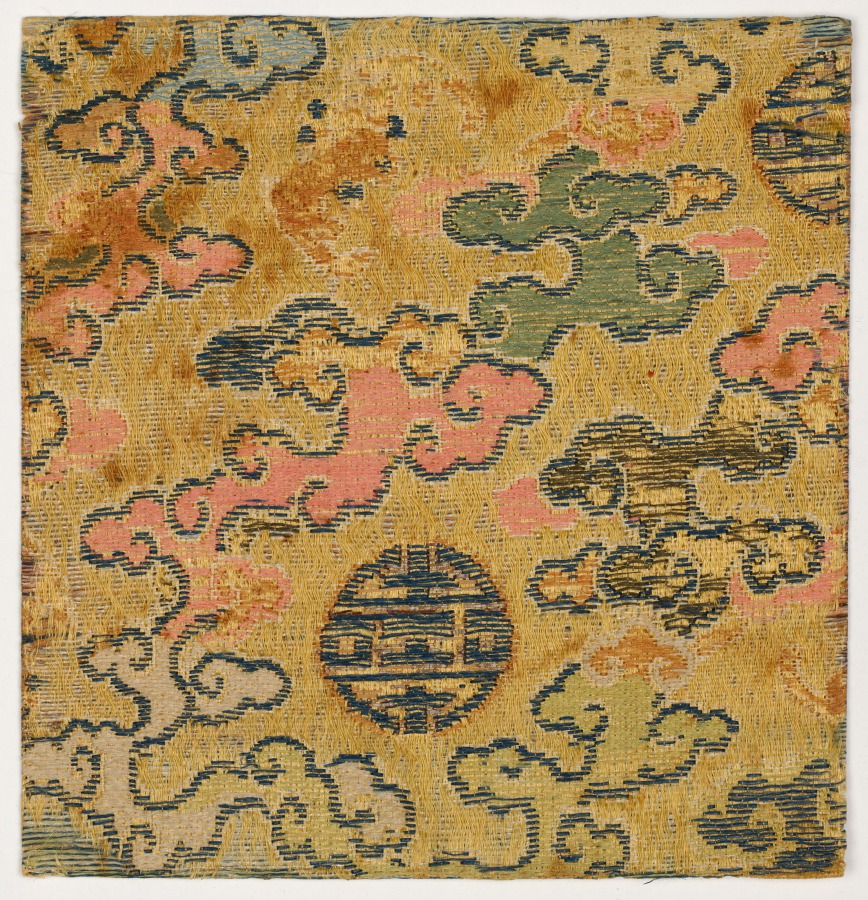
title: Fragment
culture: China, Qing dynasty (1644-1911)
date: 1700–1720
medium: Silk, diaper weave; satin ground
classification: Textile